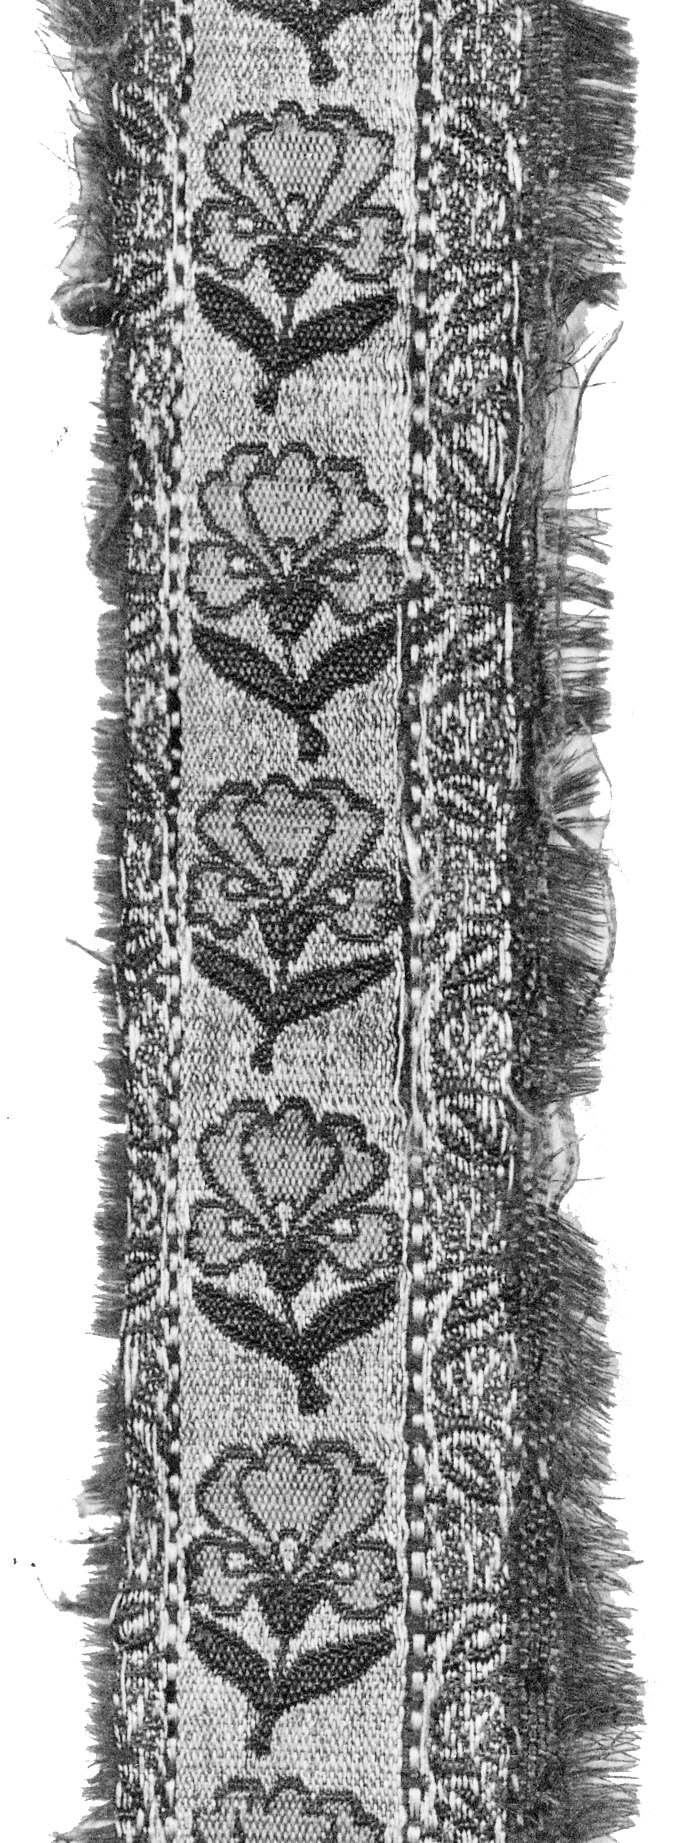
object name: Textile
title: Fragment (Border)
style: isfahan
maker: Iran (Persia, Isfahan)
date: 18th century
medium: Brocaded plain compound cloth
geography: Iran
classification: textile; weaving